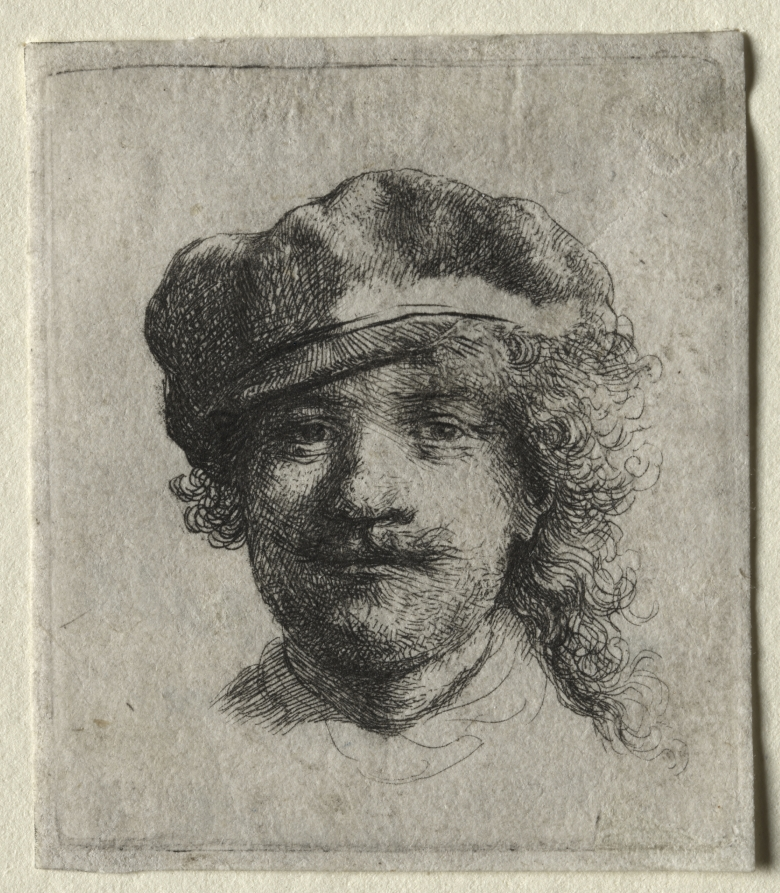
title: Self-Portrait Wearing a Soft Cap: Full Face, Head Only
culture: Netherlands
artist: Rembrandt van Rijn (Dutch, 1606–1669)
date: c. 1634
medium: etching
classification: Print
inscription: VERSO, upper left, in graphite: 21[circled] ; center, in graphite: GH. t / a23032 ; lower left, in graphite: H / 2847[underlined] ; lower left, in graphite: 325 ; lower left, in graphite: an [G.?] ; lower center, in graphite: B 2. [re?]/- ; lower right, in graphite: R[e?] 466t